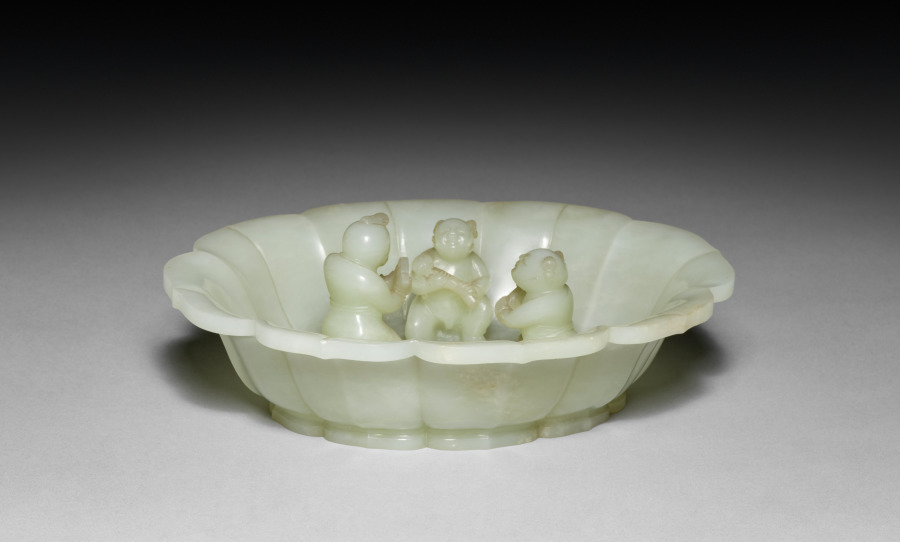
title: Octofoil Dish with Three Boys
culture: China, Qing dynasty (1644–1911), Qianlong reign (1736–95)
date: 1700s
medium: jade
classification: Jade